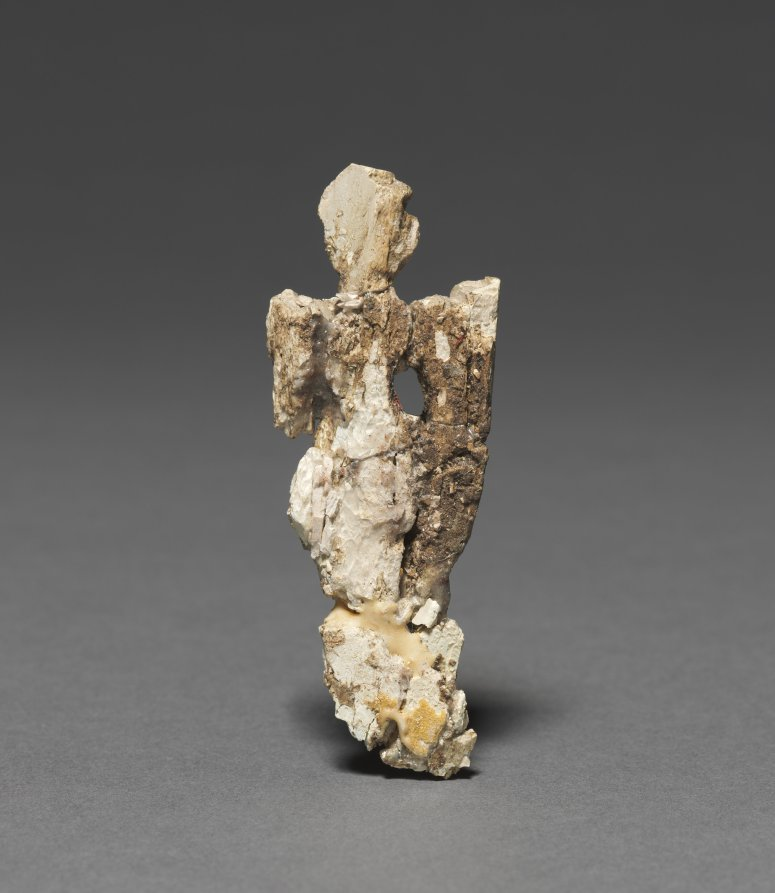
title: Standing Woman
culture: Afghanistan, Begram, Kushan period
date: c. 50–200 CE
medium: ivory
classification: Ivory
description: This ivory carving was made In India as a facing for wooden furniture, which disintegrated, leaving only the ivory veneers. Most of the imagery is life-affirming and auspicious, as seen in the image of a young woman. Indian ivory-faced furnishings--along with lacquer boxes from China and painted glass from Rome--were found in an extraordinary deposit of luxury goods at a site called Begram.